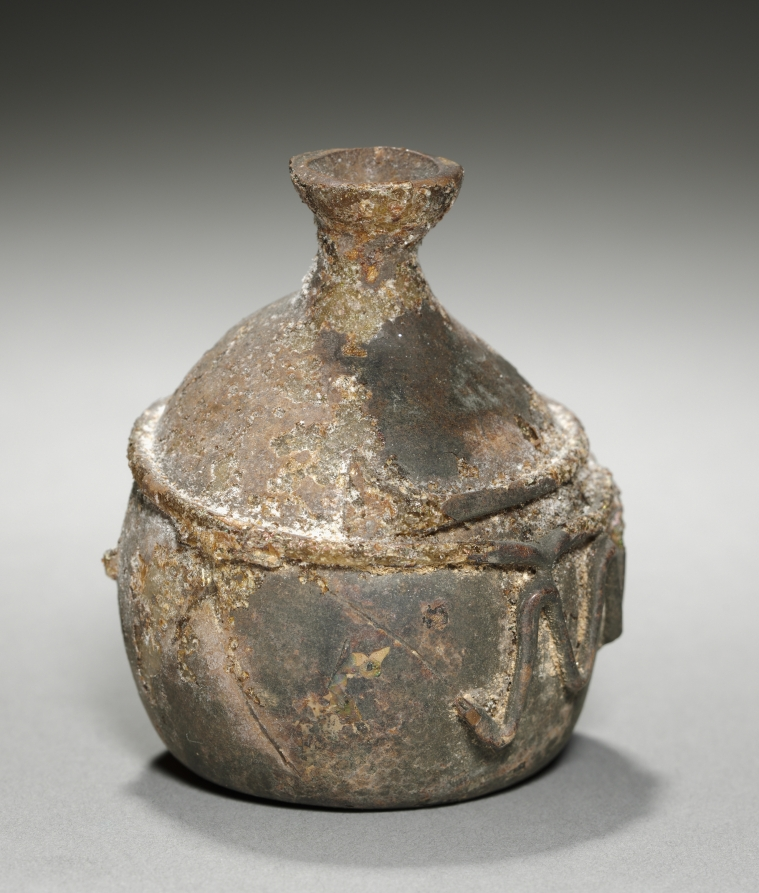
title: Vase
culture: Eastern Mediterranean, Roman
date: c. 200–500 CE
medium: glass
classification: Glass